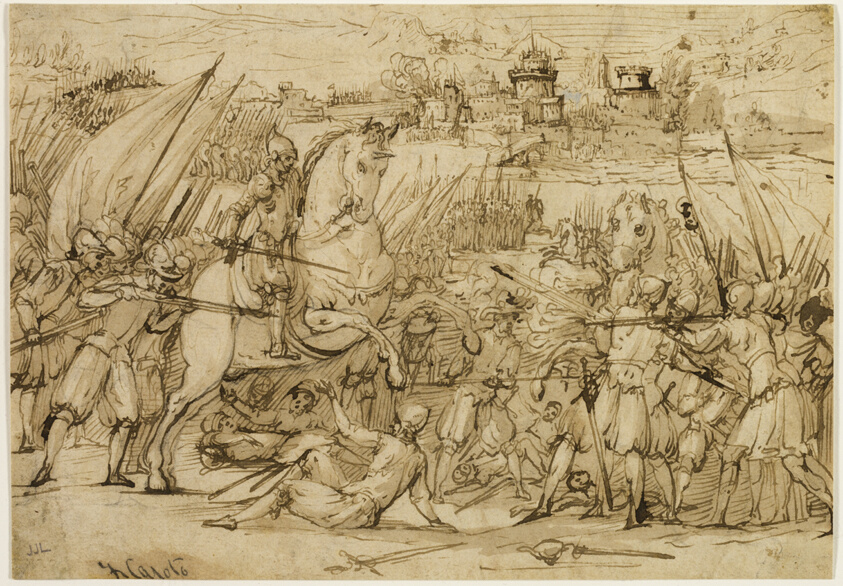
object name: Drawing and Watercolor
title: Battle Scene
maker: Attributed to Antonio Maria Viani; Italian, c. 1555/60-1629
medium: Pen and brown ink and brush and brown wash, over traces of black chalk, on ivory laid paper, laid down on ivory laid paper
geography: Italy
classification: ink and wash; drawings (visual works); prints and drawing